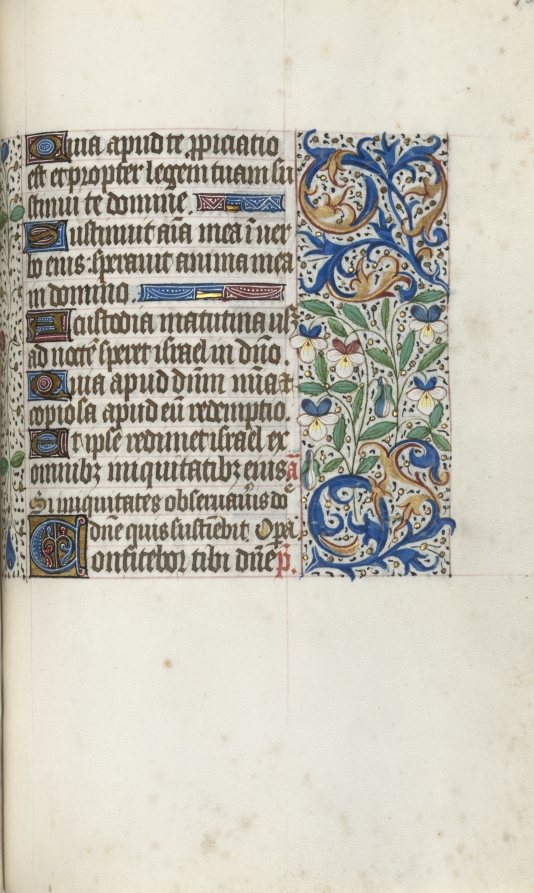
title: Book of Hours (Use of Rouen): fol. 106r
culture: France, Rouen, 15th century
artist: Master of the Geneva Latini (French, active Rouen, 1460–80)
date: c. 1470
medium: ink, tempera, and gold on vellum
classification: Bound Volume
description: In the late 1400s and early 1500s Rouen was an established and important center of book production. The city’s cathedral had a wealthy chapter that spent large sums of money to commission books and to maintain its extensive library. The stationers and booksellers would have likely been concentrated in or near the cathedral precinct. This artist, named after a manuscript now in Geneva, was Rouen’s principal illuminator during the second half of the 1400s.